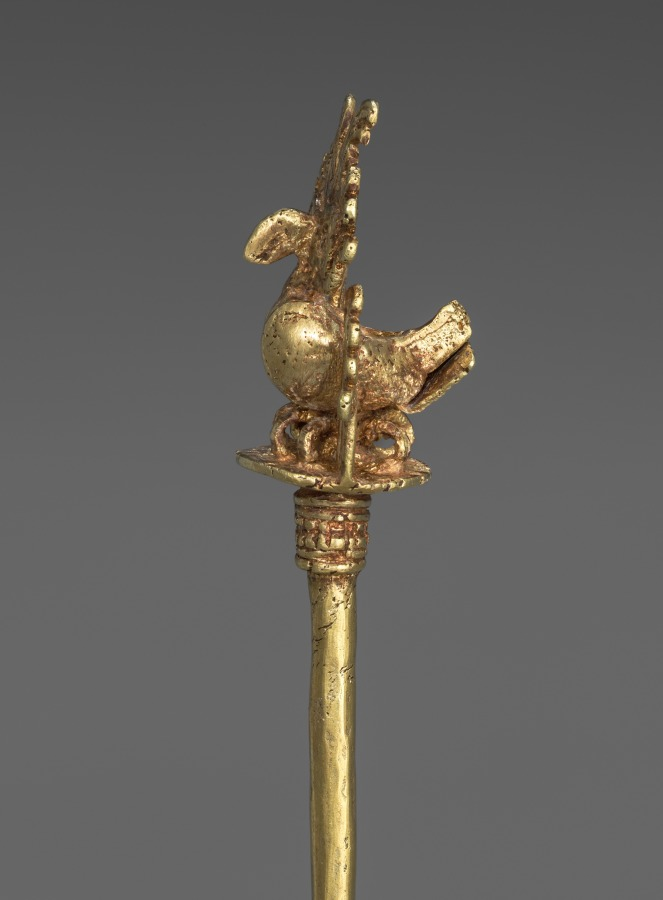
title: Lime Dipper or Pin with Owl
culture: Isthmian Region (Colombia), Calima, Yotoco period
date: 1–800 CE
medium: gold, cast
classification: Metalwork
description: An engaging miniature owl forms the finial of this dipper, which was used during coca-chewing rituals. Typically, coca leaves were chewed into a quid; then, with a dipper, lime made from powdered seashells was added to the quid to enhance the leaves' gentle stimulating effects. Contemporary natives regard coca as crucial to creating both social camaraderie and communion with supernatural forces; the same may have been true in the past.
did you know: Chewing coca leaves remains popular among indigenous communities in the Andean region.